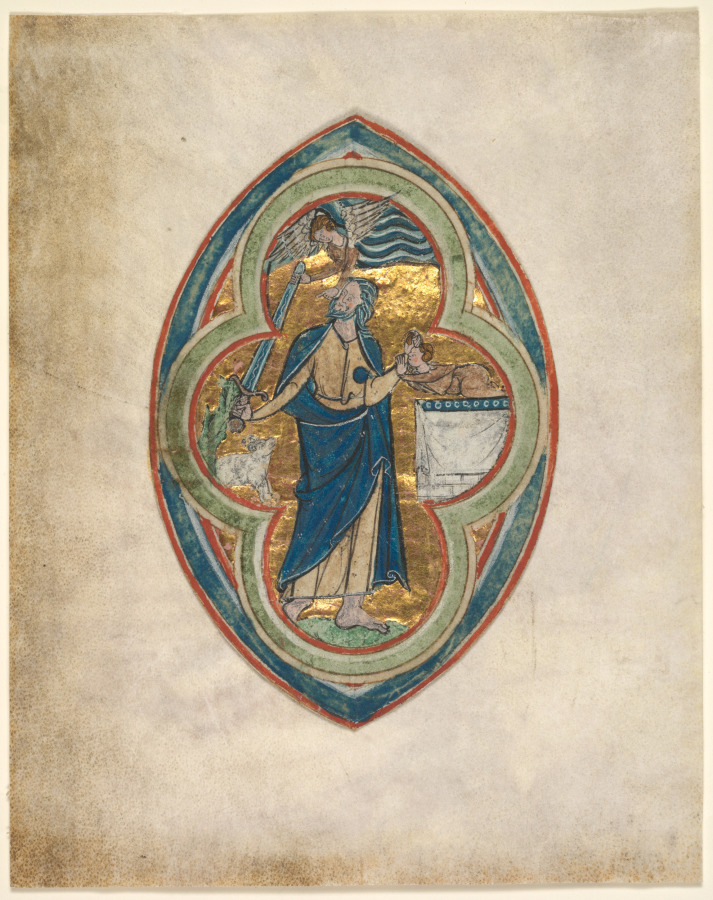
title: Miniature Excised from a Compendium in historiae genealogia Christi by Peter Poitiers: The Sacrifice of Isaac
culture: England, London, 13th century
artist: workshop of William de Brailes (English, active c. 1230)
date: 1200–1250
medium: ink, tempera, and gold on vellum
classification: Manuscript